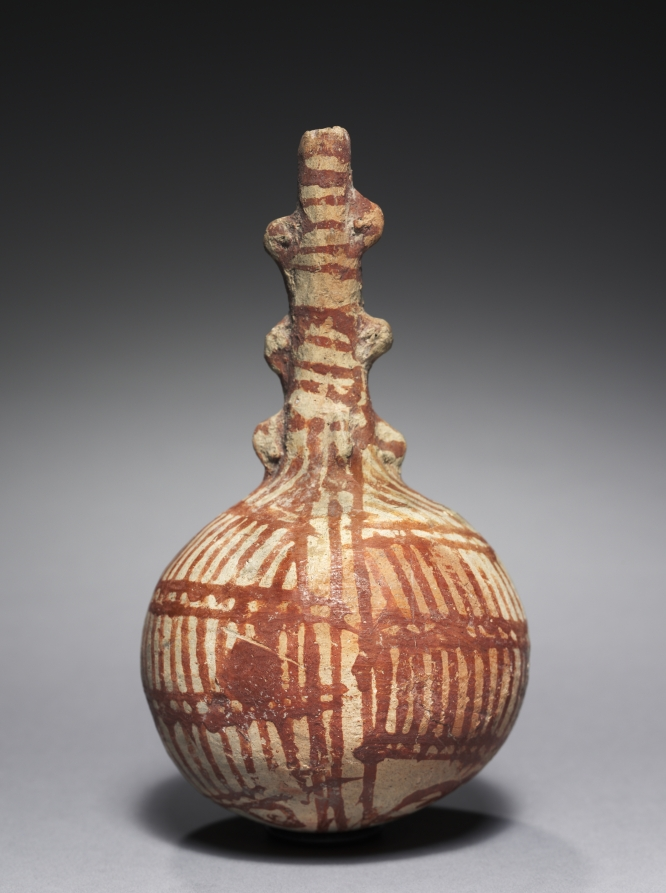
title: Jug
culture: Cyprus, middle Cypriot III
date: c. 1725–1600 BCE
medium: white painted ware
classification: Ceramic